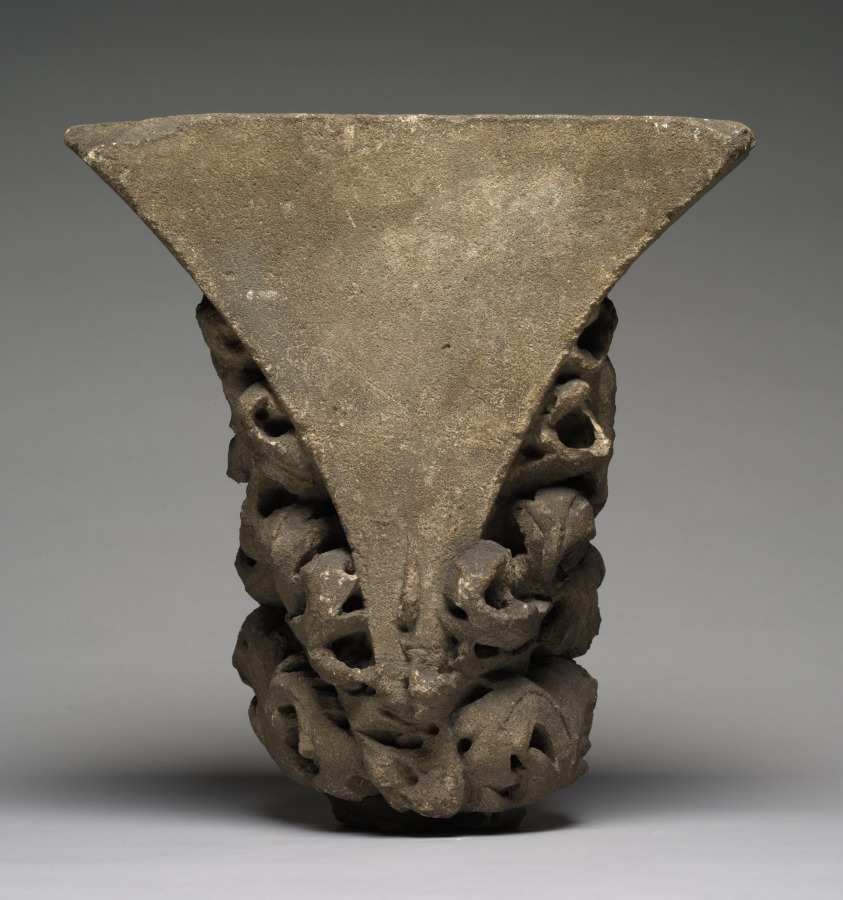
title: Architectural Fragment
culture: France, 15th century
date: 1400–1450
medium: stone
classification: Sculpture